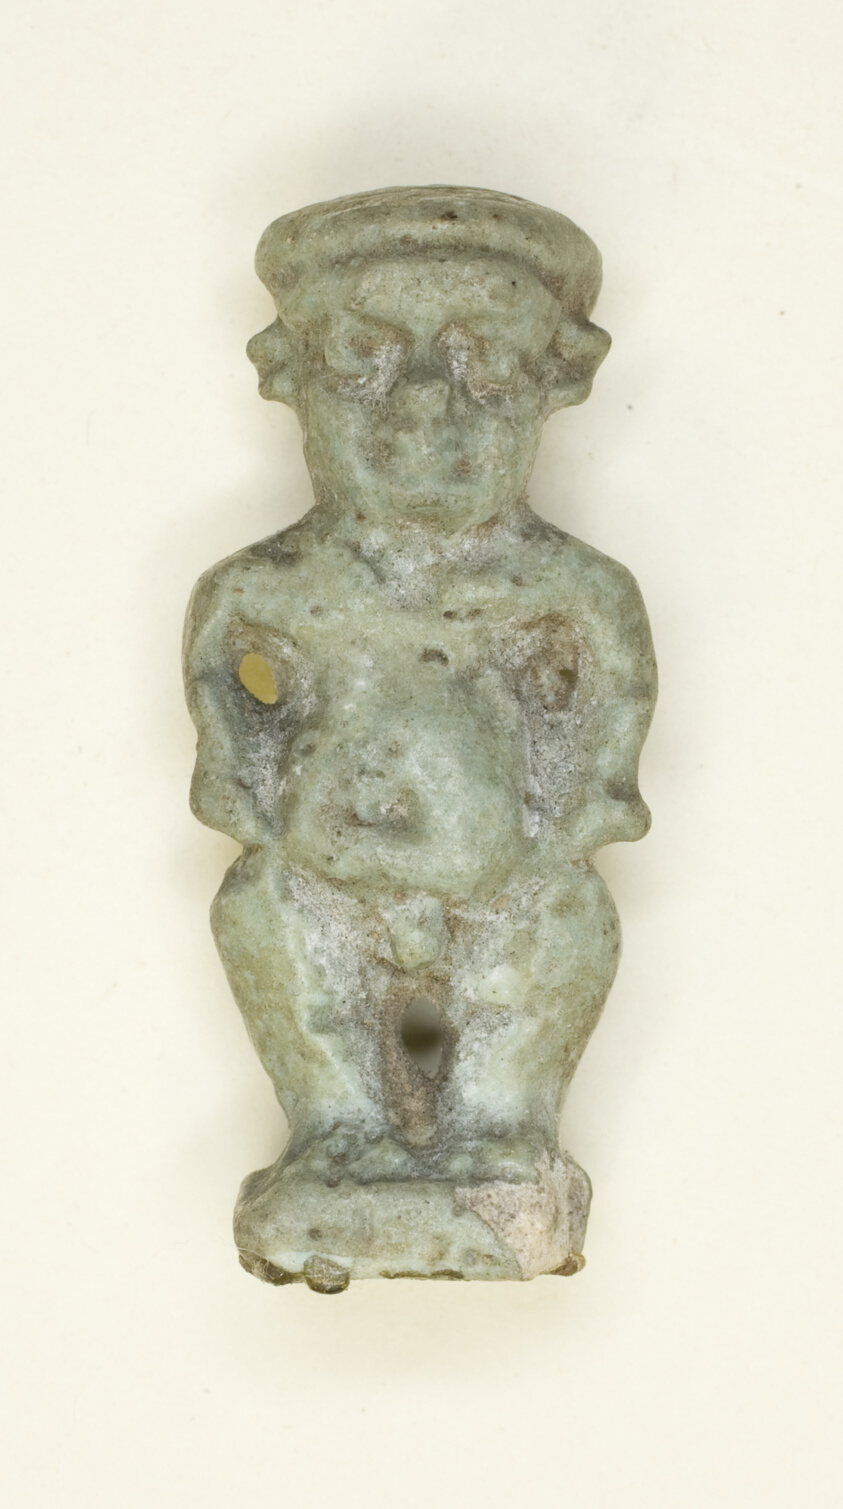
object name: Costume and Accessories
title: Amulet of Pataikos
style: egyptian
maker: Egyptian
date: Late Period, Dynasty 26–31 (664–332 BCE)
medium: Faience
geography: Egypt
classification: amulet; jewelry; ceramics; ancient art; costume; faïence (composite material)